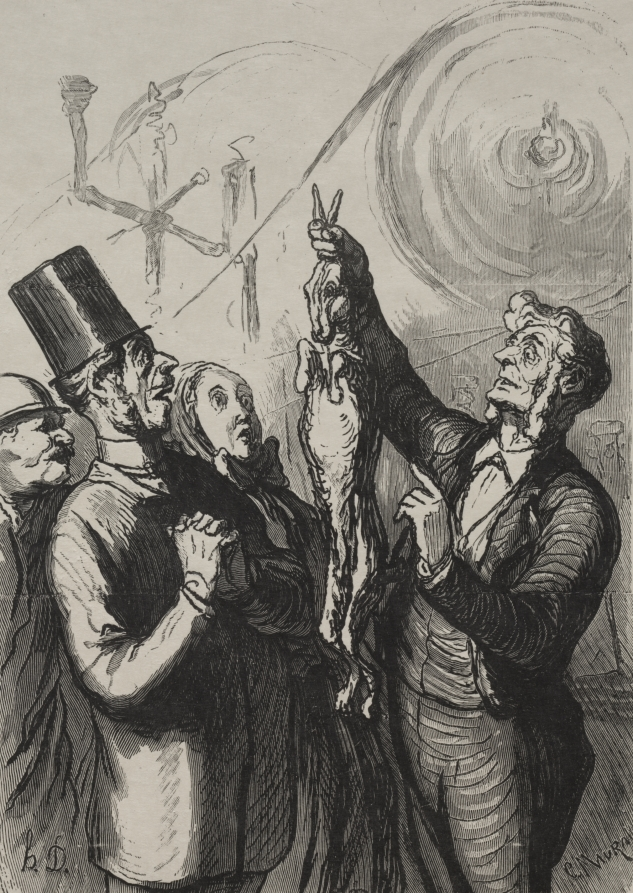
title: At the Universal Exhibition: The producer of felt hats.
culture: France, 19th century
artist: Honoré Daumier (French, 1808–1879)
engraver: Charles Maurand (French, 1824–1904)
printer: François Louis Schmied (Swiss, 1873–1941)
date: 1867, printed 1920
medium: wood engraving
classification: Print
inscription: Lower margin, in pencil: 65/75 ; red stamp: FLS